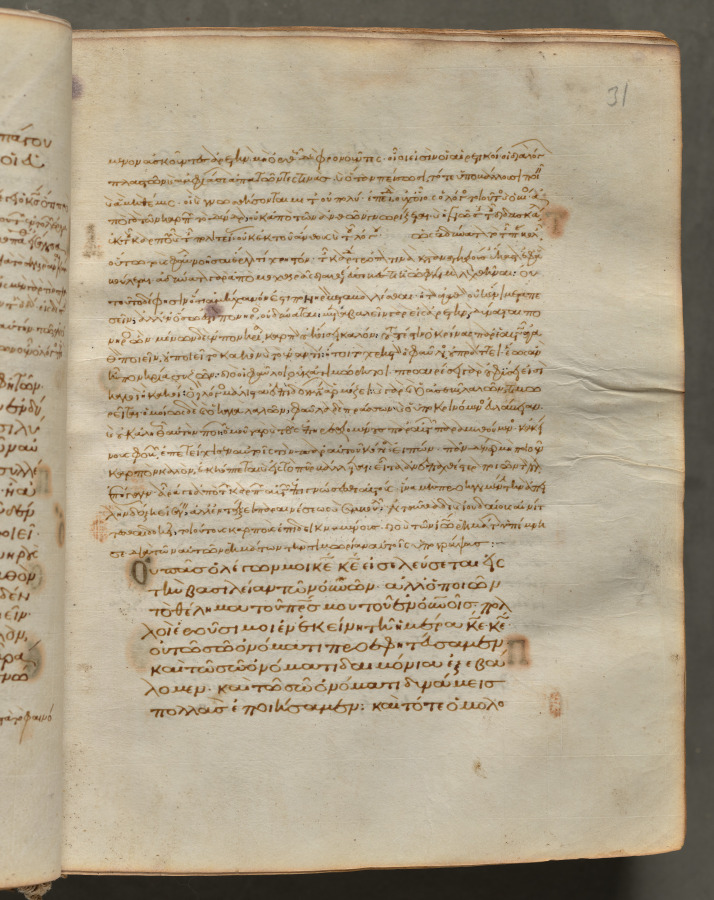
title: Text, folio 31 (recto), from a Gospel Book with Commentaries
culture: Byzantium, Constantinople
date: c. 1000–1100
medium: ink, tempera, and gold on vellum; leather binding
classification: Bound Volume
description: Each of the four gospels in this book opens on a page with brilliantly illuminated borders depicting the author of the text as well as birds—principally peacocks, symbols of the immortality of the soul—and fountains, representing the fountain of life and the salvation of the soul. This volume consists of 428 leaves with texts in Greek. Its level of sophistication suggests that it was probably written and decorated in a monastery in Constantinople.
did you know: Gospel Books were carried in procession through Byzantine churches.